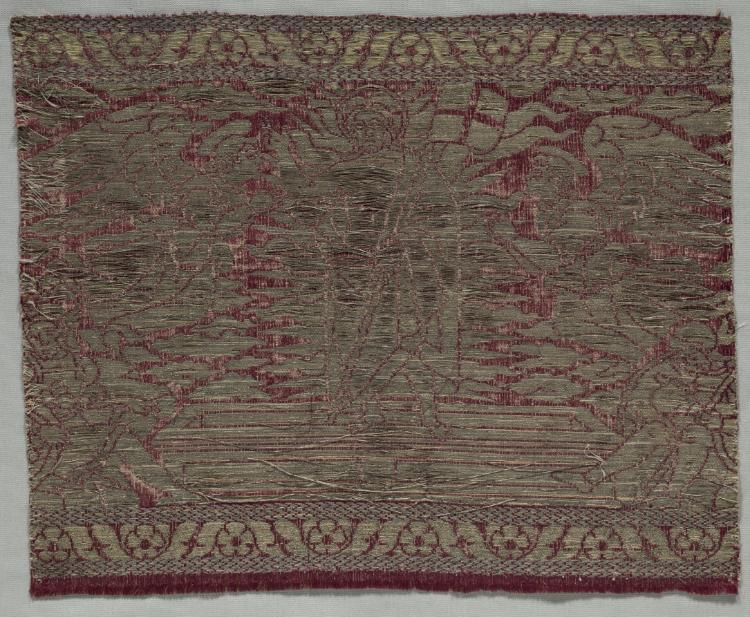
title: Orphrey Band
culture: Italy, Florence, late 15th century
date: late 1400s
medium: lampas weave, silk and gold thread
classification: Textile